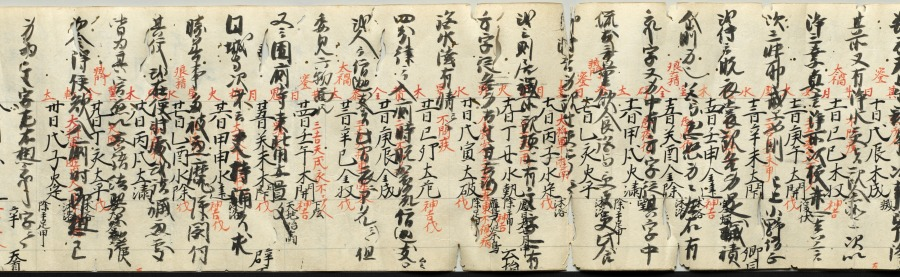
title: Scroll of Miscellaneous Notes written on a Calendar by Priest Seigen (verso)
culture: Japan, Kamakura period (1185–1333)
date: c. 1200–1231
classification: Manuscript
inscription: bears miscellaneous notes written by Priest Seigen.